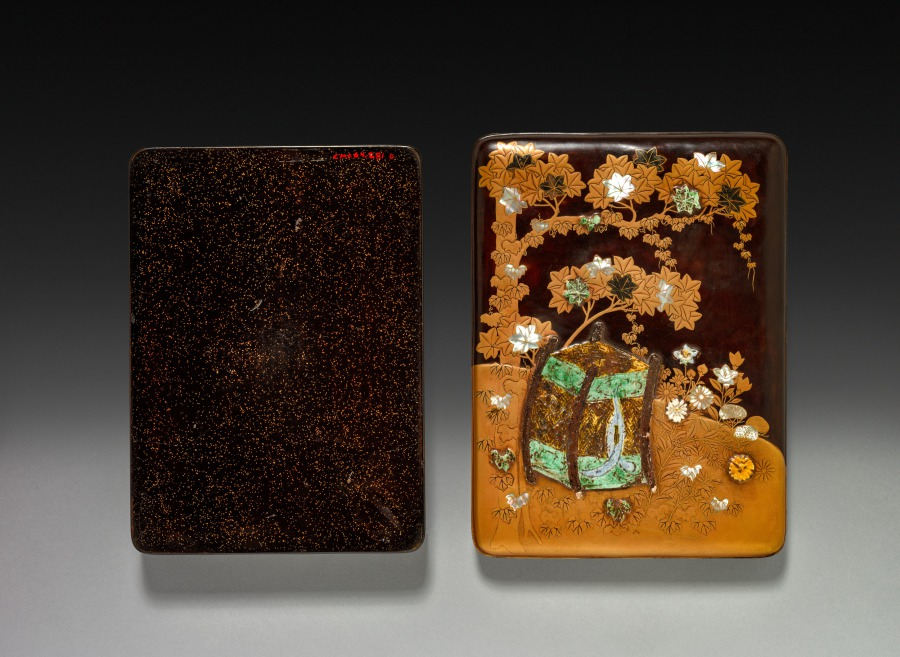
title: Inkstone Case and Lid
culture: Japan, Edo period (1615–1868)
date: 1800s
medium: lacquer on wood inlaid with mother-of-pearl, applied carved metal, and glazed ceramic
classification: Lacquer